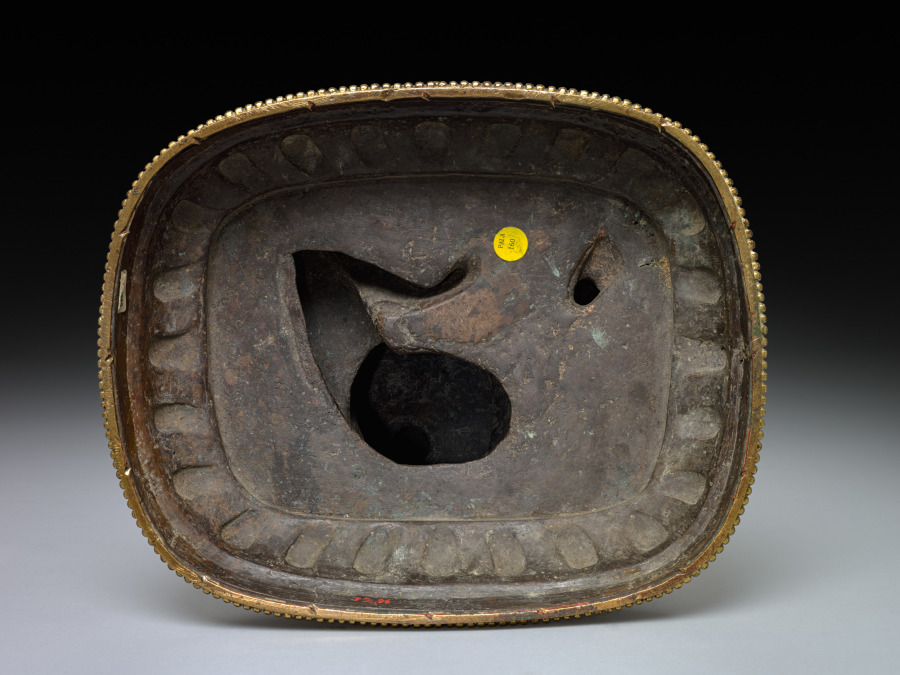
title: Virupa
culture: China, Ming dynasty (1368-1644), Yongle reign (1403-1424)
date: early 1400s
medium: Gilt bronze with silver, stones, and pigment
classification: Sculpture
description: Virupa is one of the great teachers in the history of tantric Buddhism. His posture references his ability to stop the sun; as an enlightened being, he can control phenomena of nature. As a tantric practitioner, he overturns ordinary assumptions about proper behavior, so he overeats, drinks large quantities of liquor, and waits for the king to pay his bill at the tavern. At the edge of the lotus pedestal is an inscription identifying the image as having been made in the imperial kilns of the third emperor of the Ming dynasty in China as a gift to a Tibetan monastic leader. While closely linked to Tibetan styles, the luxurious detailing, special gilding process, and the casting of the ornaments onto the body without use of inlay are specifically Chinese characteristics.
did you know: Virupa's clothing and jewelry are embellished with silver and stones, while pigments enhance his hair and eyes.